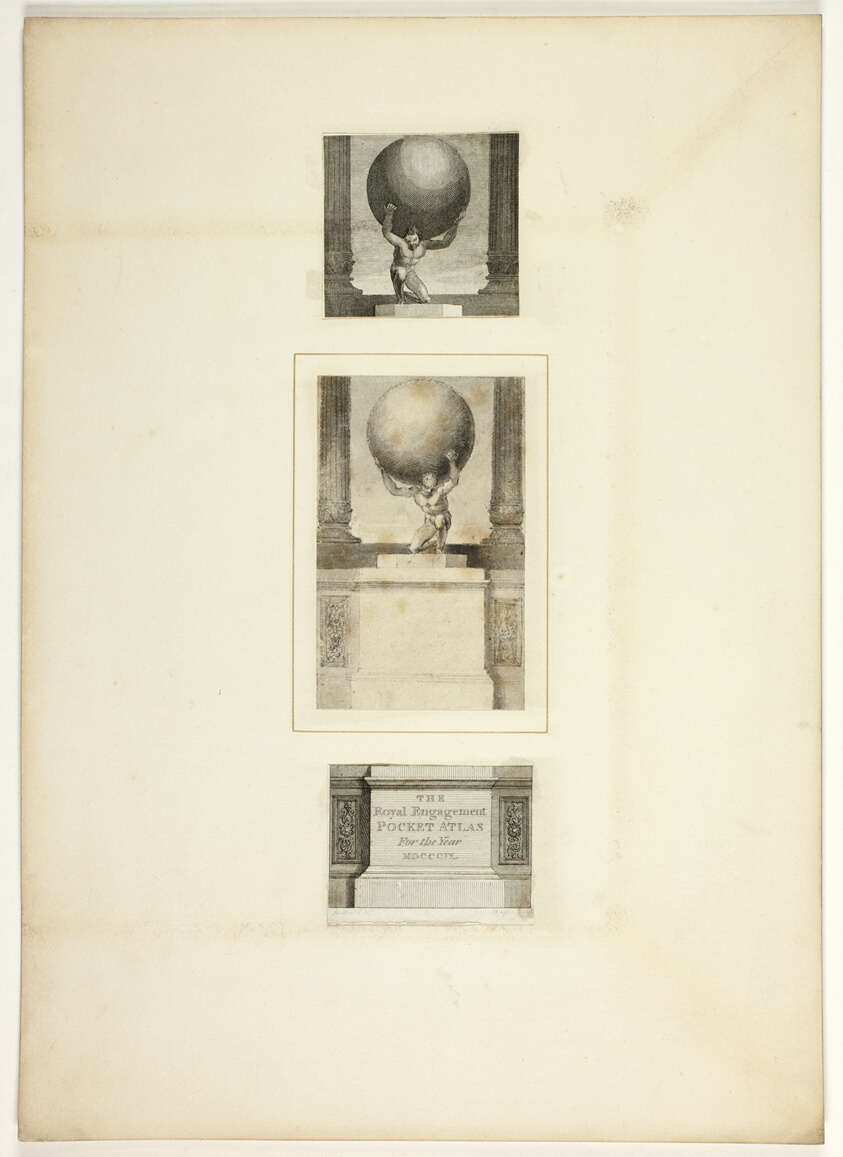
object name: Print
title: Frontispiece from Marmion, in the 1809 Royal Engagements Pocket Book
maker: after Thomas Stothard; English, 1755-1834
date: c. 1808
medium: Engraving on paper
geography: England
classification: engraving; print; prints and drawing